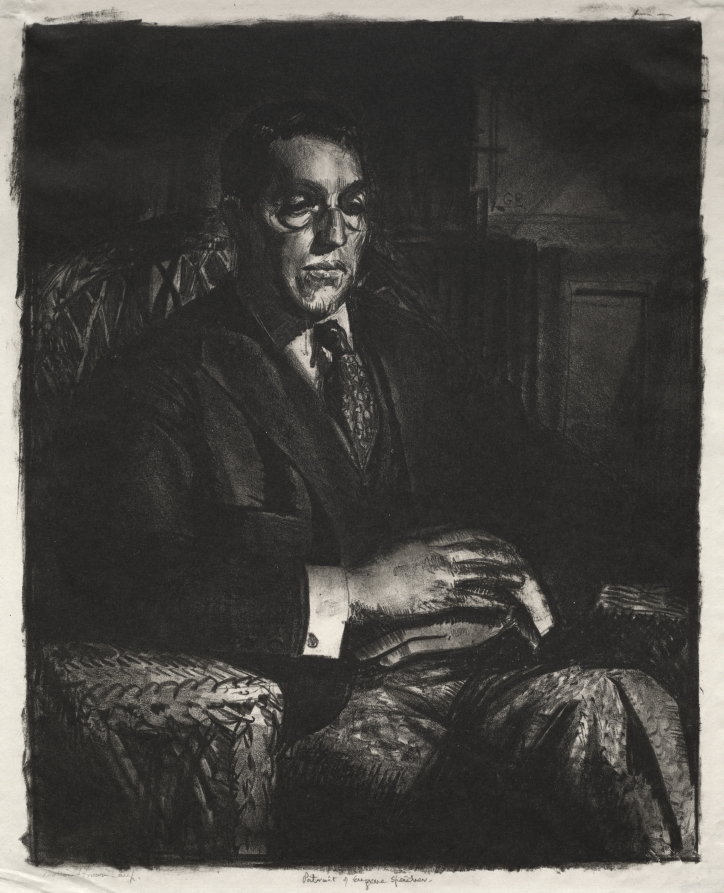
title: Speicher Seated in a Chair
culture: America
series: 12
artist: George Bellows (American, 1882–1925)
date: 1924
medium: lithograph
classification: Print